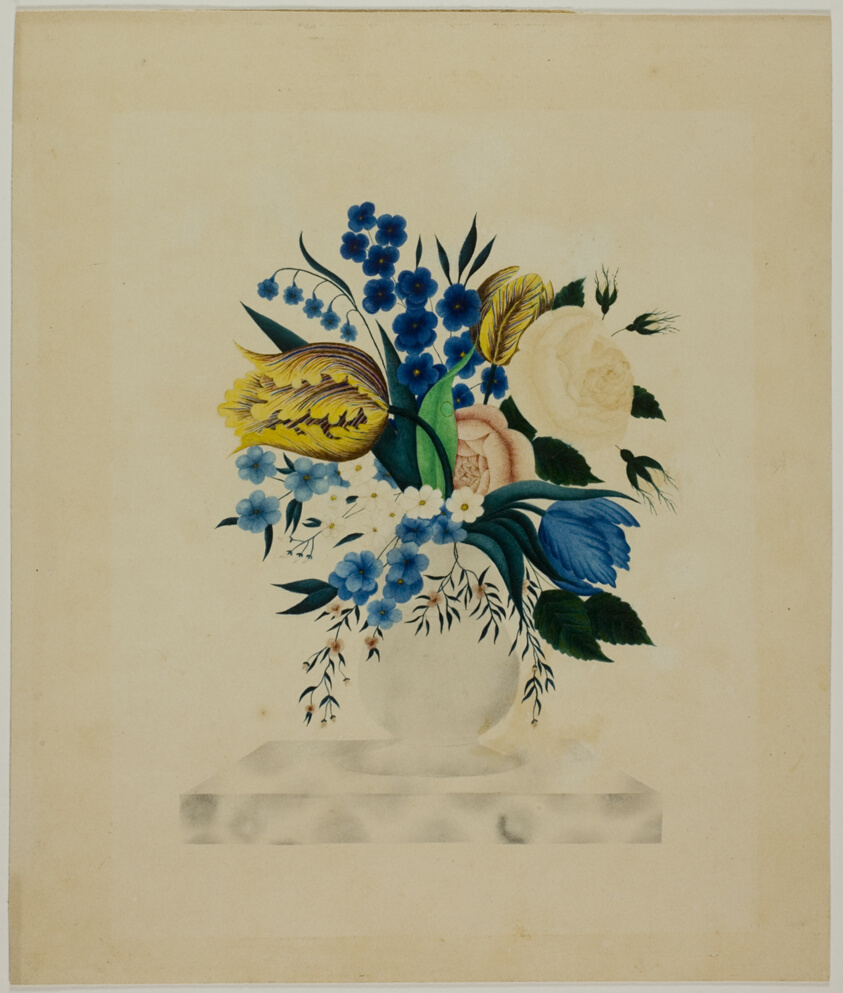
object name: Drawing and Watercolor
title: Flowers in a Marble Vase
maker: Unknown Artist; American, 19th century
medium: Watercolor over graphite on cream wove card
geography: United States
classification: watercolor; drawings (visual works); prints and drawing